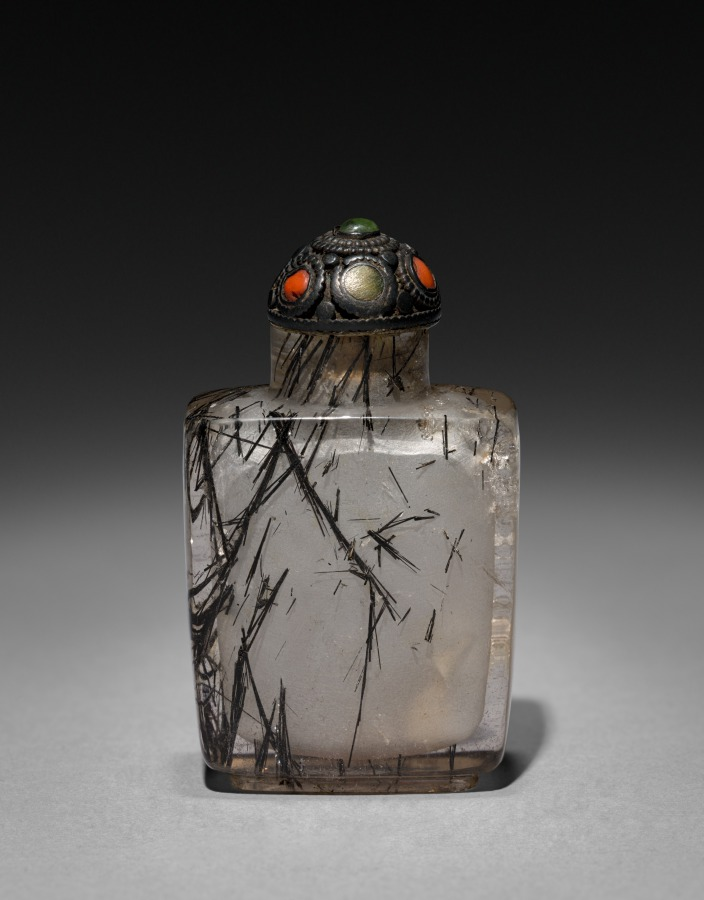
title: Snuff Bottle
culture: China, Qing dynasty (1644-1911)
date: 1644–1911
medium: glass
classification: Glass